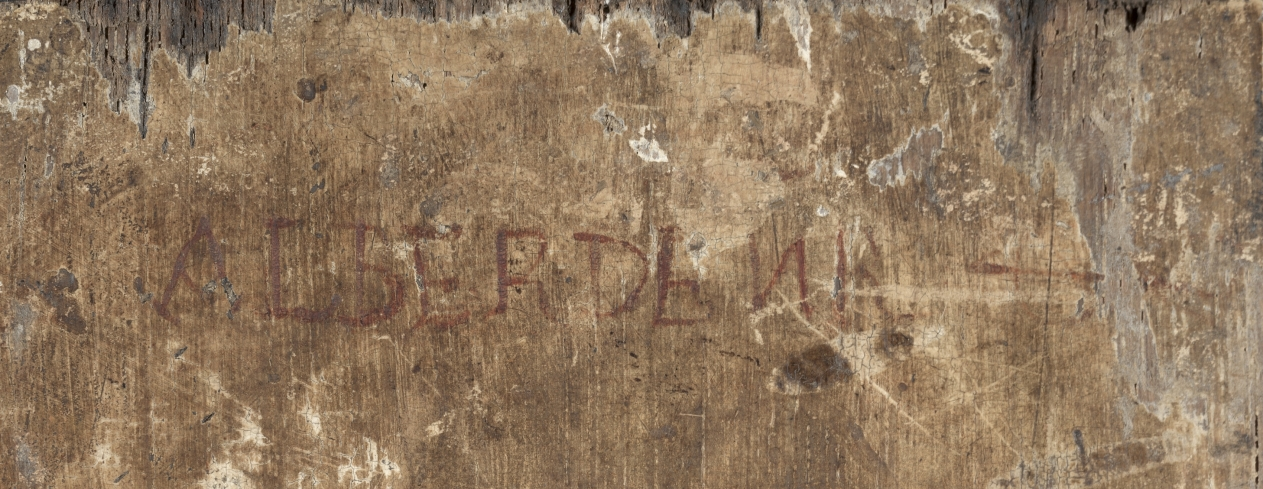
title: John the Baptist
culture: Flanders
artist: Robert Campin (Netherlandish, 1375/79–1444)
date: c. 1410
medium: oil on oak panel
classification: Painting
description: According to tradition, John the Baptist wears a hair shirt under a white cloth, associated with newly baptized Christians. The flag bearing a red cross symbolizes resurrection. In marked contrast, the background features a lavish gold-patterned silk. The display of such luxurious fabrics continues an ancient tradition of using the finest objects in the worship of God. This painting has been cut down along the lower edge and would have originally shown a full-length image of the saint. It was probably the right wing of a triptych, with John the Baptist gazing upon a central image of the Virgin and Child. Campin first settled in Tournai around 1405-6 as a free master of the guild of painters, and he bought citizenship there in 1410, which suggests he was born elsewhere. Although heavily indebted to contemporary masters of manuscript illumination, Campin displayed greater powers of realistic observation than any other painter before him. He was one of the first artists to experiment with the use of oil-based colors, in lieu of egg-based tempera, to achieve the brilliant color typical of this period.